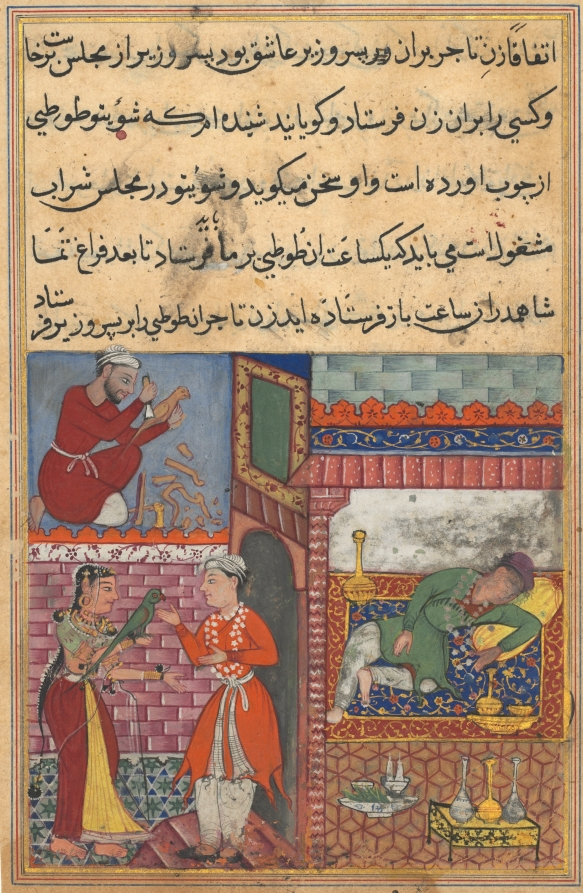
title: The vizier’s son receives the magic wooden parrot from the wife of the merchant, who is drunk, and has a replica made by a carpenter, from a Tuti-nama (Tales of a Parrot): Tenth Night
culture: Mughal India, court of Akbar (reigned 1556–1605)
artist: Lalu (Indian, active mid-1500s)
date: c. 1560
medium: gum tempera, ink, and gold on paper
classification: Painting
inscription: lālū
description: At right, the merchant lies drunk while the vizier’s son receives the parrot from the merchant’s wife, with whom he is having an affair. In the upper register, a skilled carpenter carves an exact replica of the parrot that the vizier’s son will later pass to the merchant’s wife.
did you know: The long-necked bottles are full of liquor.